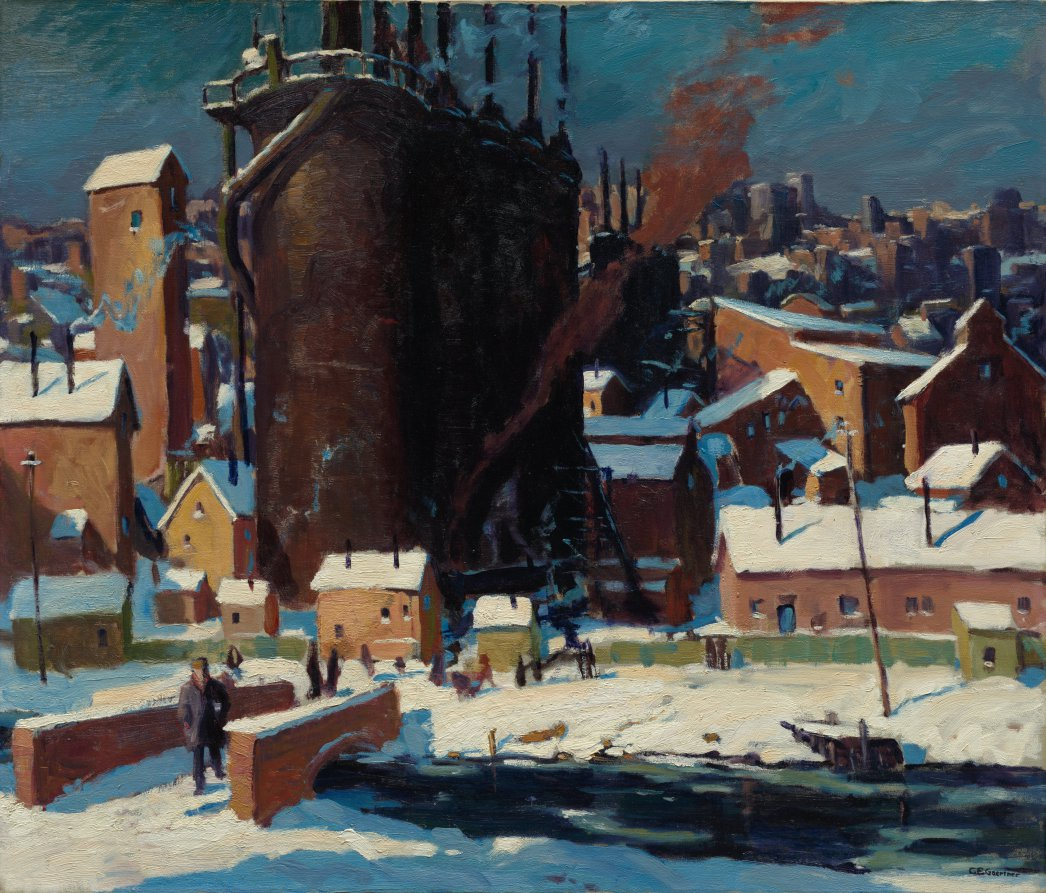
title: The Furnace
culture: America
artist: Carl Gaertner (American, 1898–1952)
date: 1924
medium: oil on canvas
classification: Painting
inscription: signed lower right: C.F. Gaertner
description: One of the most widely exhibited artists working in Cleveland during the second quarter of the 1900s, Gaertner specialized in painting the city and its environs. Among his favored subjects were scenes of Cleveland’s manufacturing heyday, including The Furnace, a composition praised at the time by a curator at the Cleveland Museum of Art for capturing "admirably the sense of drama and power of industrial achievement."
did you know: Blast furnaces convert iron ores to molten metallic iron, an essential step in the making of steel.